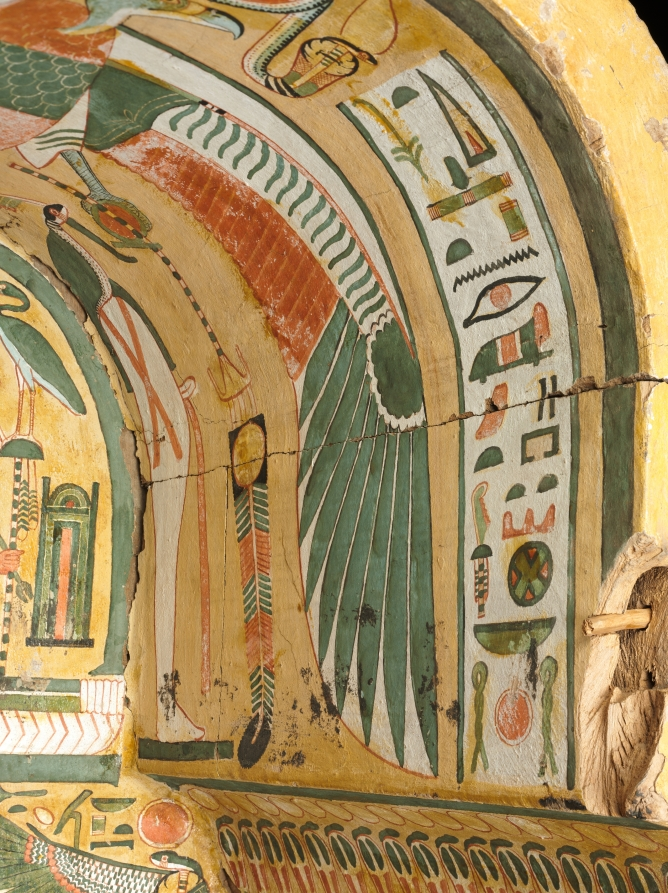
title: Coffin of Bakenmut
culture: Egypt, Thebes, Third Intermediate (1069–715 BCE), Dynasties 21–22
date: c. 1000–900 BCE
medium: gessoed and painted sycamore fig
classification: Funerary Equipment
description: The coffin of Bakenmut is one of the finest examples of painted wooden coffins made for the priests of Amen and their families at Thebes during Dynasty 21 and early Dynasty 22. The pharaohs of this time were no longer buried in the Valley of the Kings, but instead built tombs in the Delta, far to the north, where they resided. Security was lax in the Theban necropolis. The coffins and funerary goods of the wealthy citizens of Thebes were placed in unmarked and undecorated family tombs cut into the cliffs on the west bank of the Nile. All the care and detail that in more prosperous times were devoted to the decoration of the tomb chapel were now lavished on the elaborately painted coffins. Every available surface is crowded with religious scenes, images of funerary gods and goddesses, protective spells, and magical symbols. The deceased appears mummiform. An elaborate floral collar entirely covers the upper body, exposing only the separately attached hands (now lost). A pair of red "mummy braces" are crossed over the chest, their point of intersection marked by a winged sun disk. The lower body is covered with tiny figures modeled in gesso against a yellow background, which gives the effect of gold inlaid with glass or semiprecious stone. The decoration on the interior features two deified dead kings of Dynasty 18. Although these rulers had lived centuries before, memory of their greatness was still very much alive. The main scene near the top depicts Tuthmosis III, the great military pharaoh, who lived 500 years before Bakenmut. Posed as a mummy, the ruler wears a brilliant feathered garment enfolding him with falcon’s wings. The scene below features back-to-back seated images of Amenhotep I, regarded as the patron of the Theban cemetery and worshiped as a local god there.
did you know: Originally another smaller coffin was placed inside this outer coffin and in that the deceased with a mummy board would have rested.